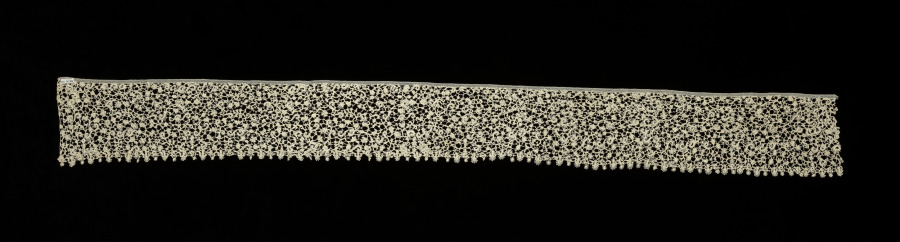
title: Lace Edging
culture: Italy, Venice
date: 1600s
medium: Linen: needle lace (point de niege, rose point, rosalline)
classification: Lace